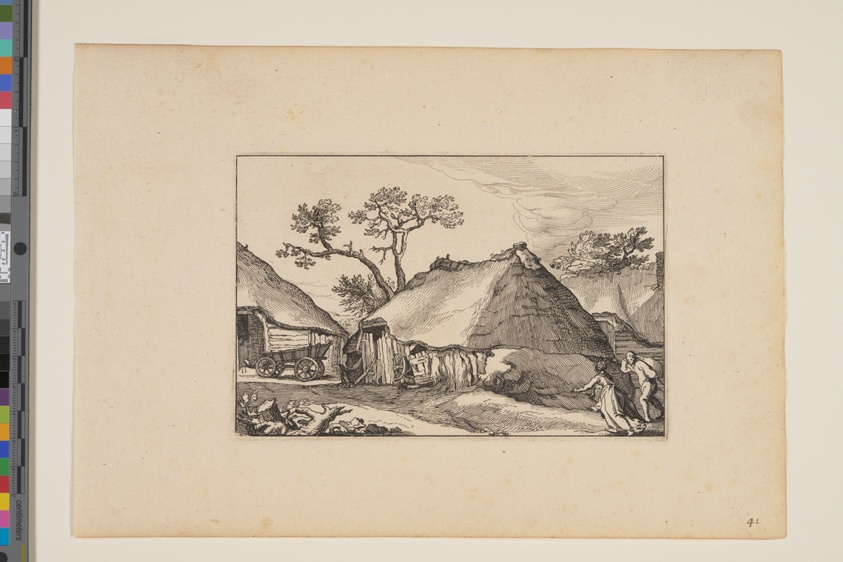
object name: Print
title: Two Barns, Cart at Left, from Landscapes (Verscheyden aerdige Lanthuysen...)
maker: Claes Jansz. Visscher (Netherlandish, c. 1550–c. 1612); after Abraham Bloemaert (Dutch, 1566–1651)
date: 1620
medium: Etching on ivory laid paper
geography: Netherlands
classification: print; paper; prints and drawing; etching